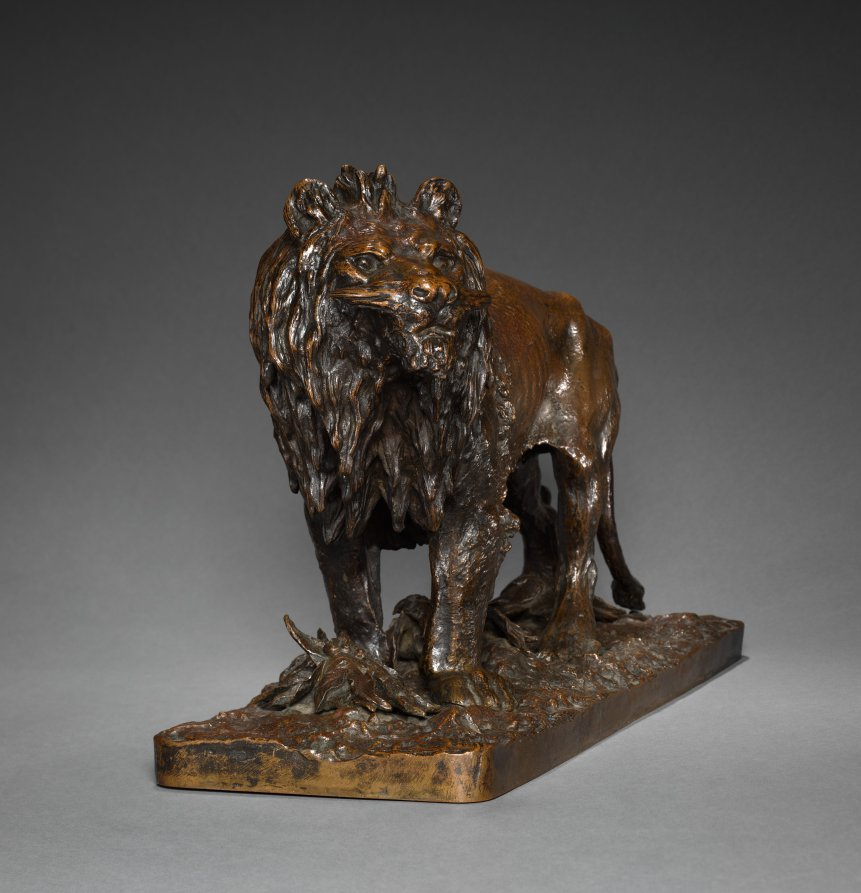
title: Standing Lion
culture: France, 19th century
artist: Christophe Fratin (French, 1801–1864)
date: c. 1837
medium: bronze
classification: Sculpture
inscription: Signed near clump of foliage beneath lion: "Fratin"